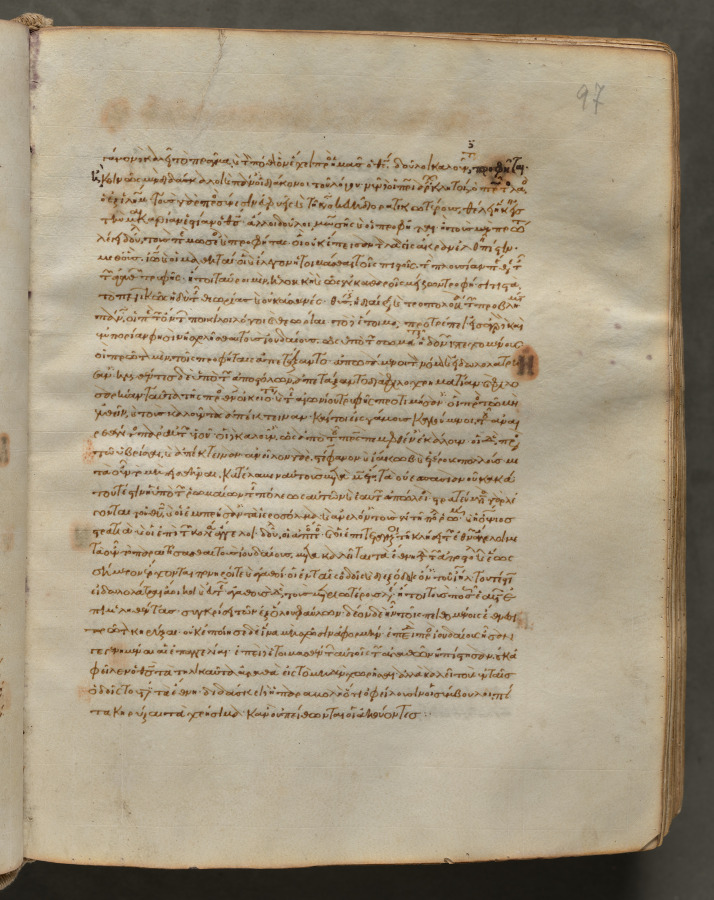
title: Text, folio 97 (recto), from a Gospel Book with Commentaries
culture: Byzantium, Constantinople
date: c. 1000–1100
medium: ink, tempera, and gold on vellum; leather binding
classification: Bound Volume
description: Each of the four gospels in this book opens on a page with brilliantly illuminated borders depicting the author of the text as well as birds-principally peacocks, symbols of the immortality of the soul-and fountains, representing the fountain of life and the salvation of the soul. This volume consists of 428 leaves with texts in Greek. Its level of sophistication suggests that it was probably written and decorated in a monastery in Constantinople.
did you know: Gospel Books were carried in procession through Byzantine churches.